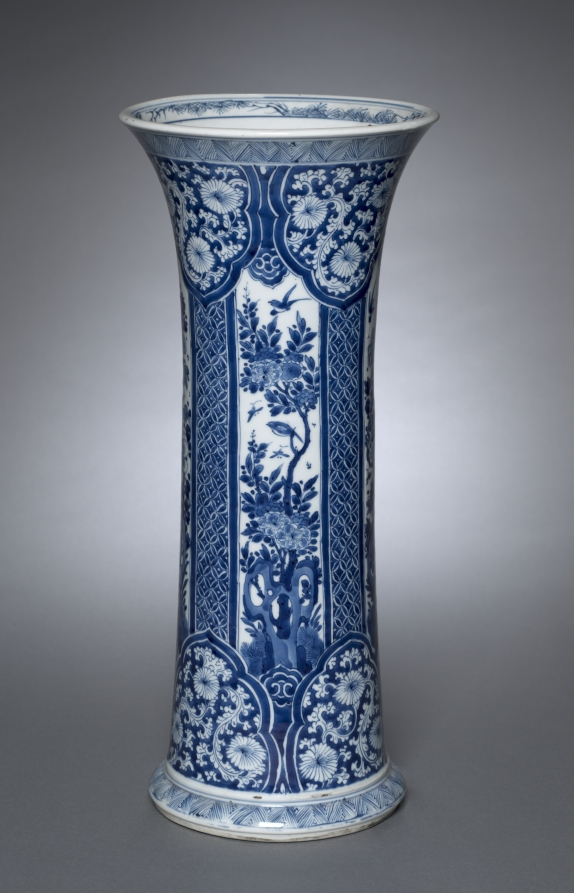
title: Vase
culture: China, Jiangxi province, Jingdezhen kilns, Qing dynasty (1644–1911), Kangxi reign (1662–1722)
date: 1662–1722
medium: porcelain with underglaze blue decoration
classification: Ceramic